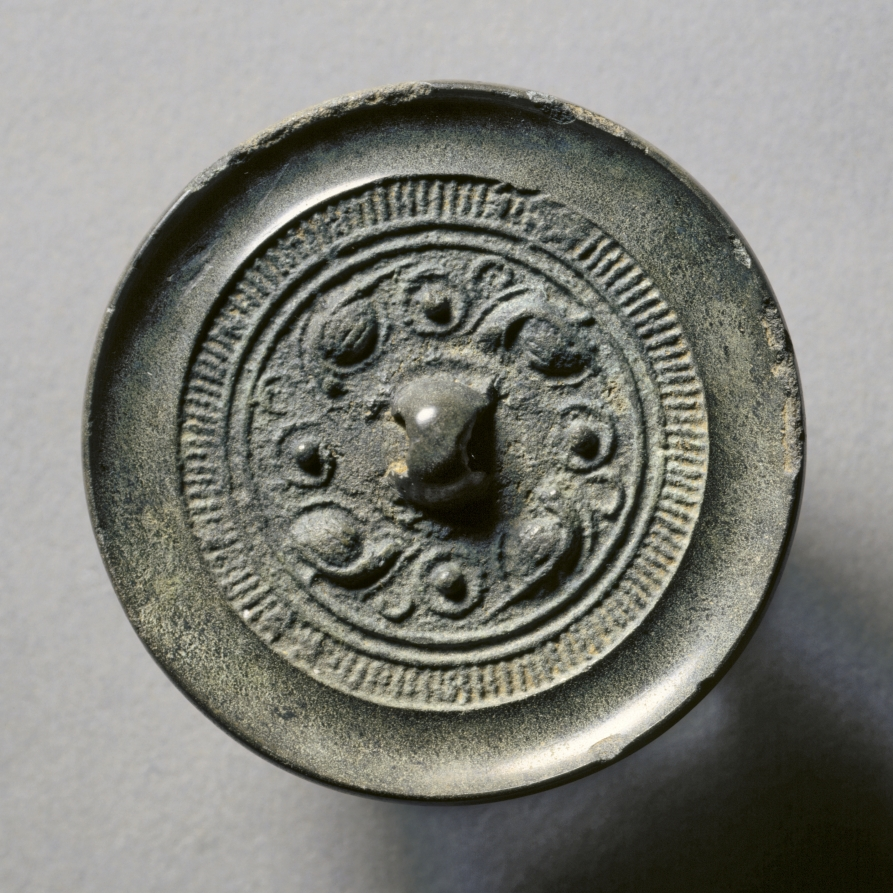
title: Mirror with Four Nipples and Four Birds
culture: China, Western Han dynasty (206 BCE–8 CE)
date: 206 BCE–9 CE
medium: bronze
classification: Metalwork